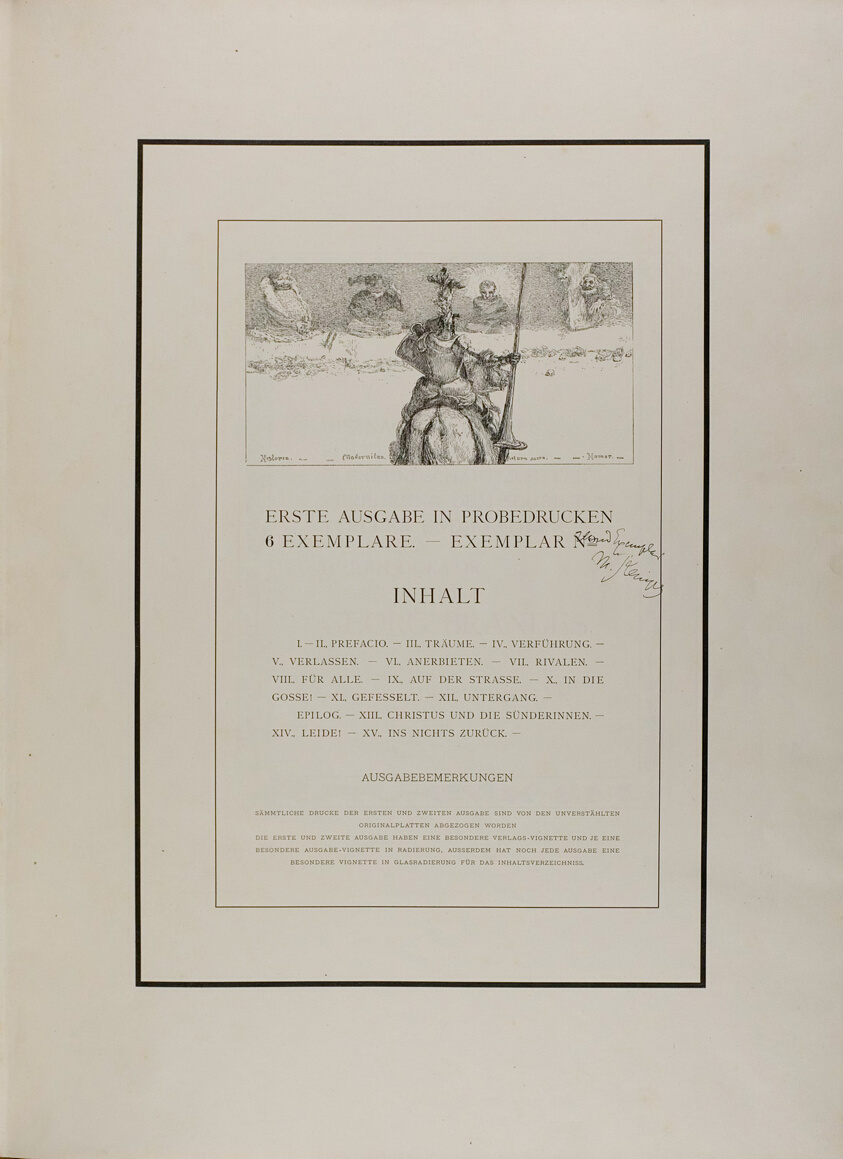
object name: Print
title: Historia, Modernitas, Pictura sacra, Homer, from A Life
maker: Max Klinger (German, 1857-1920); printed by Otto Felsing (German, 19th century)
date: 1884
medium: Zincograph in black on cream laid paper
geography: Germany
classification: zincograph; lithograph; print; prints and drawing